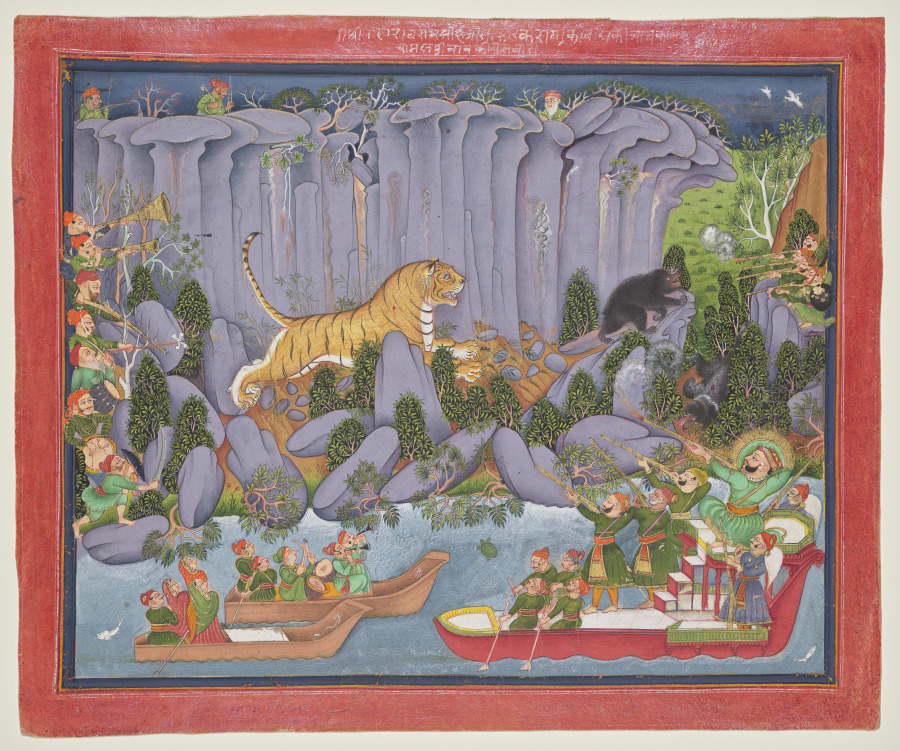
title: Tiger Hunt of Ram Singh II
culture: Northwestern India, Rajasthan, Rajput kingdom of Kota, court of Ram Singh II (reigned 1826–66)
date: c. 1830–40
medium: Gum tempera, ink, and gold on paper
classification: Painting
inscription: [[recto, upper margin, in white Devanagari script]] Śrī māhārāo rām sīnghjī sīkār ke rāyā kī bīḍā kī cāc kī Cāmlaṇī nāva kīya savāri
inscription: [[verso, in blue ink]] 105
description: Set against the dramatic backdrop of the cliffs that define the landscape of the small princely kingdom of Kota, a majestic tiger has just been shot by the king. Noisemakers with a firebrand drive the tiger out of the forest, and men at the right keep bears at bay. The women and musicians in two small boats look on in admiration.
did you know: The drummers and horn blowers proclaim to the population that the king shot a tiger.